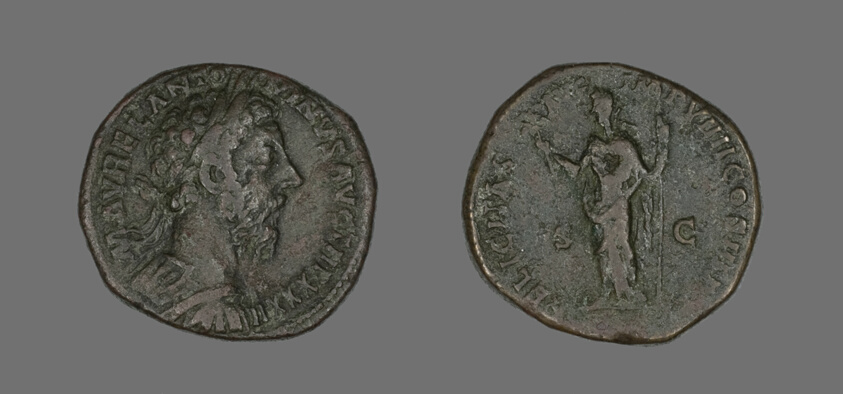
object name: Coin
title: Sestertius (Coin) Portraying Emperor Antoninus Pius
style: roman (ancient, style or period), ancient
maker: Roman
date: December 177-December 178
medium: Bronze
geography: Roman Empire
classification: coin; ancient art